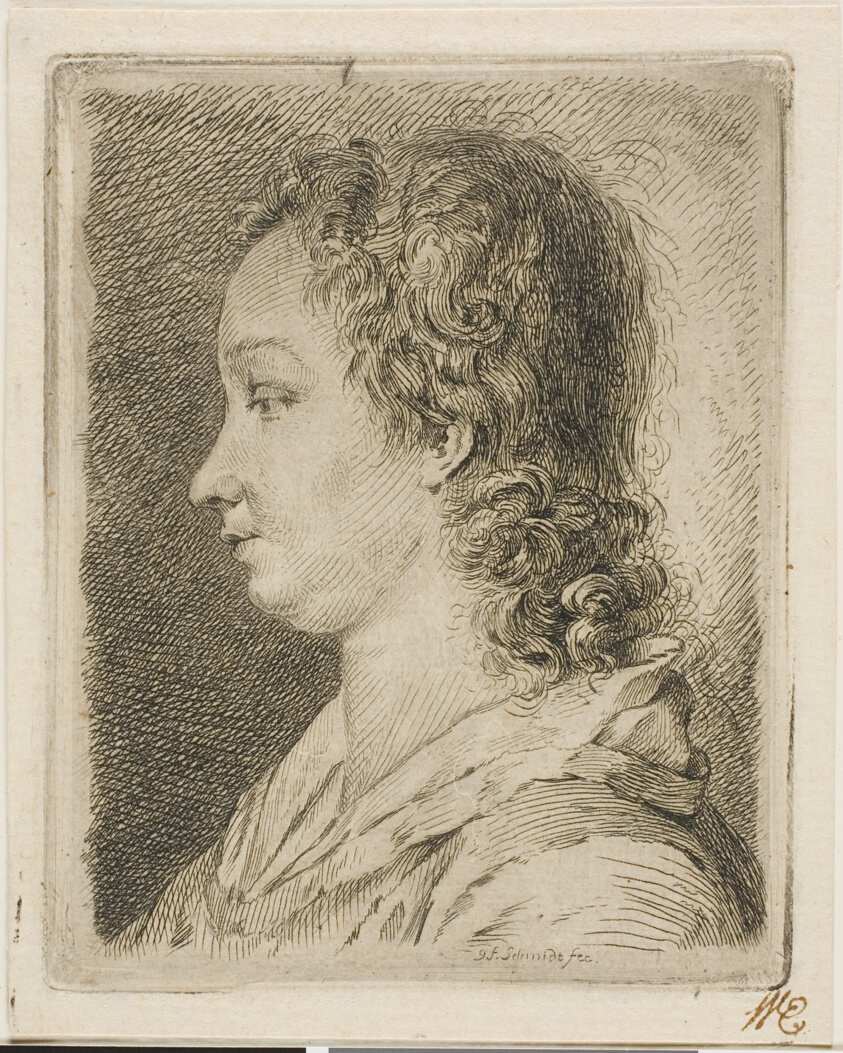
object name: Print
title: Madame Schmidt (the Artist's Wife)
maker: Georg Friedrich Schmidt (German, 1712-1775)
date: 1753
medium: Etching on paper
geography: Germany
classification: etching; print; prints and drawing